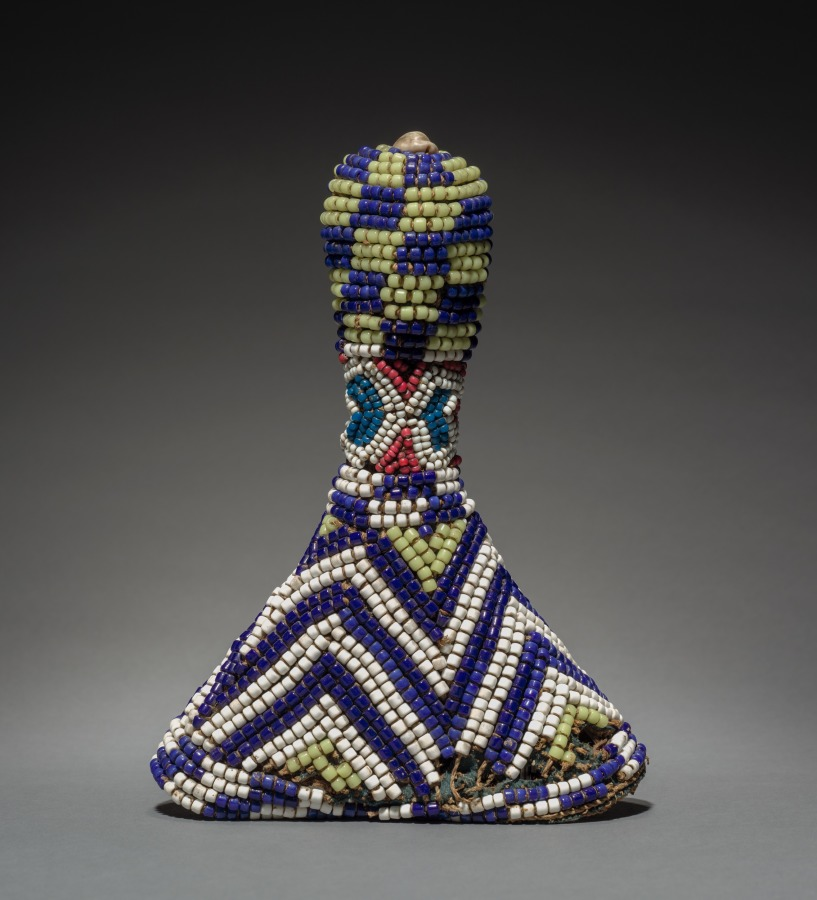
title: Beaded Hat or Headpiece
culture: Africa, Central Africa, Democratic Republic of the Congo, Kuba, 20th century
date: early 1900's?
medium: Glass beads, cloth, plant fiber, and cowrie shells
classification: Garment